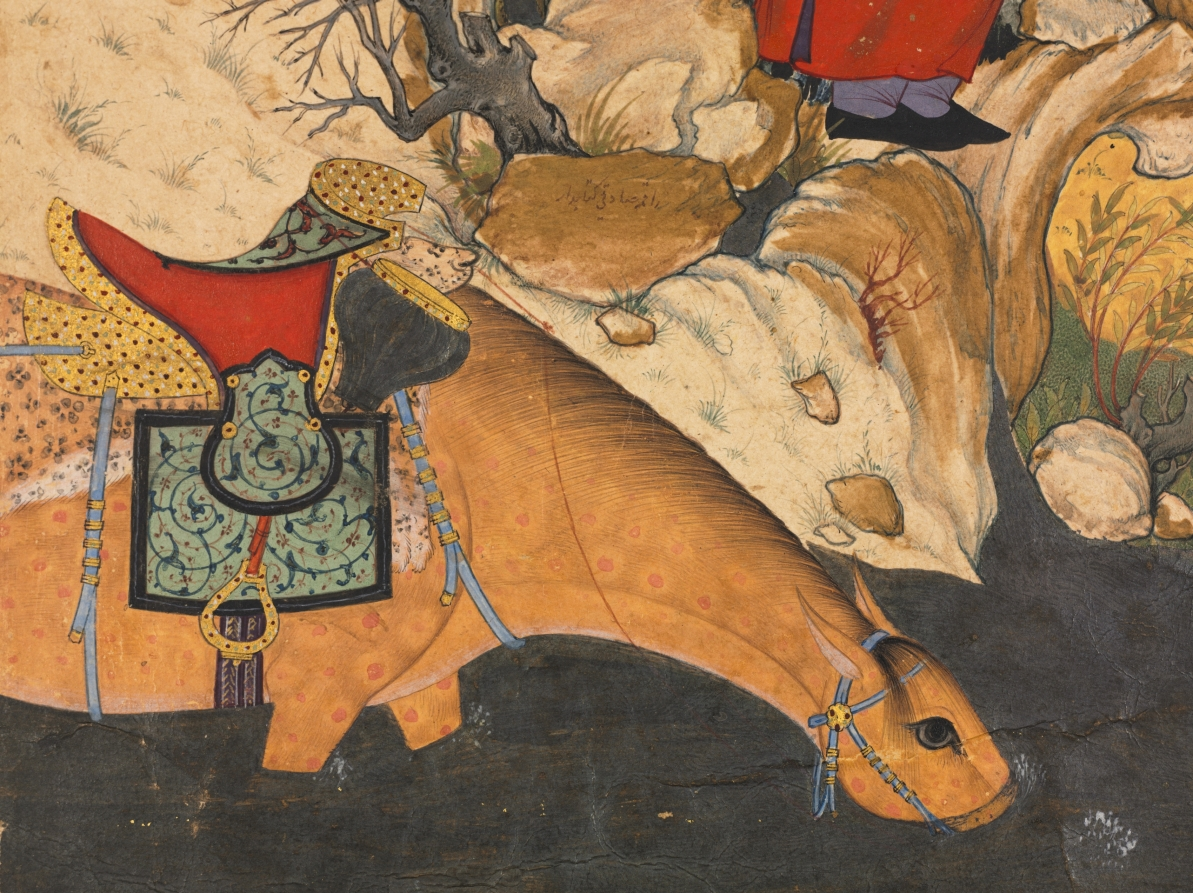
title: Aulad Tied to a Plane Tree, from a Shahnama by Firdausi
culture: Iran, Qazvin or Isfahan?, Safavid period (1501–1722)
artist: Sadiqi Bek (Iranian, 1533–1609)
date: 1575–1600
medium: opaque watercolor, gold, and silver on paper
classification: Manuscript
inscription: Signed in script by the artist.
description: This large-scale illustration reflects a new aesthetic with simpler paintings of isolated figures which artists signed for less sophisticated patrons in the marketplace, replacing the previous idealized court style as a result of decreased support under Shah ‘Abbas (reigned 1587–1629). Instead, he improved the infrastructure to increase international trade and the country’s wealth. The scene depicts Aulad, who guided the legendary hero Rustam through numerous ordeals. Since Aulad was not entirely trusted, Rustam often tied him to a tree, here a plane tree which shelters a pair of nesting birds. The painter, poet, and royal librarian Sadiqi Bek signed his name in tiny script on the brown rock below Aulad.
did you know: Rustam’s dappled horse named Raksh drinks water; it was originally silver, but has now oxidized to black.